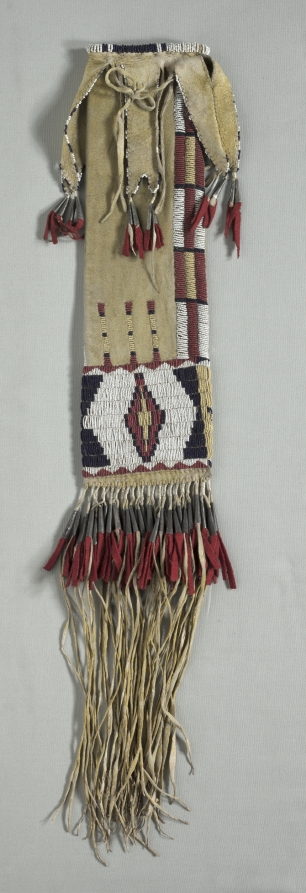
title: Pipe or Tobacco Bag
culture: Native North America, Plains, Tsitsistas (Cheyenne)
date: c. 1870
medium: Native-tanned hide, yellow pigment, glass beads, red trade cloth, tin cones, sinew thread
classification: Leather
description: The shape of this bag indicates it was made to hold tobacco and one of the pipes that played a paramount role in the lives of Plains nations. Smoking is a means of prayer—the smoke carries thanks and entreaties into the other-than-human realm—and pipes were lit to seek protection and guidance on new endeavors, during alliance and dispute negotiations, to mark life’s milestones, and in many other situations. By the late 1800s, when this example was made, such bags were a standard element of prestigious men’s formal dress regalia.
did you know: Glass and metal beads were imported from Europe.